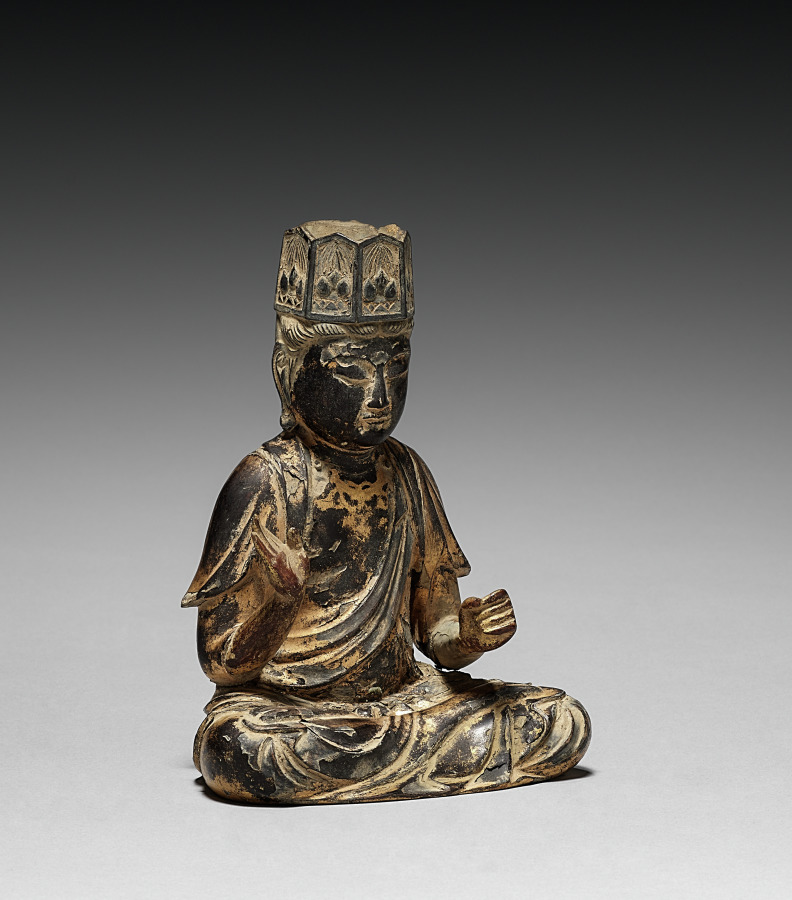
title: Bodhisattva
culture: Japan, Heian period (794–1185)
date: 900s-1100s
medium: gilded wood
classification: Sculpture